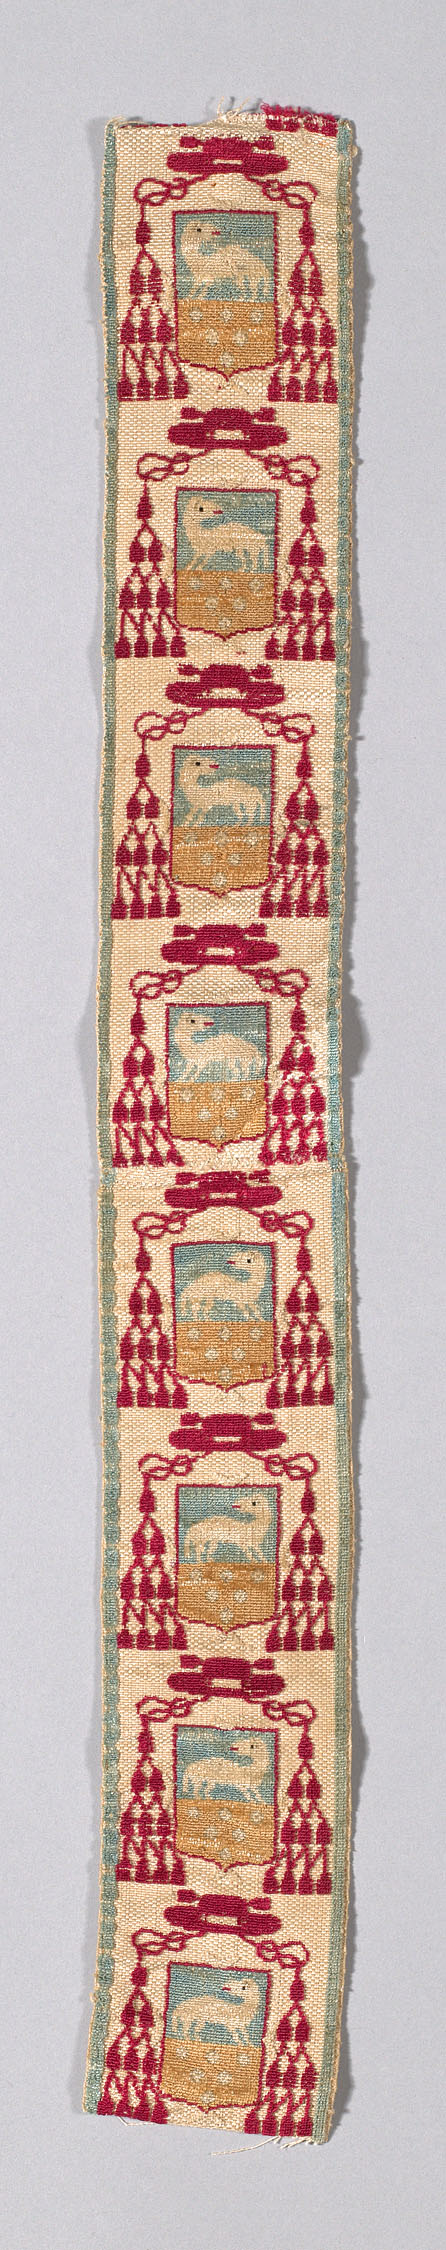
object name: Textile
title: Ribbon with Medici Coat-of-Arms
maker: Possibly Italy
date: 17th/18th century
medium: Silk and cotton, plain weave with supplementary patterning warp and supplementary pile warp forming cut and uncut voided velvet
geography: Italy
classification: textile; weaving - velvet